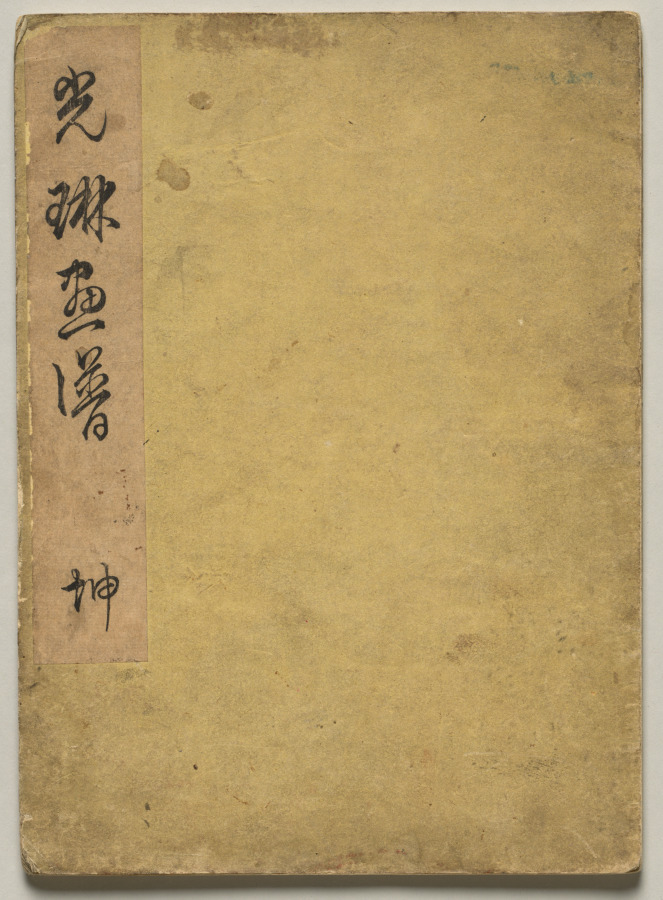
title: The Kōrin Picture Book (Volume 1)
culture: Japan, Edo period (1615–1868)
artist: Nakamura Hōchū (Japanese, d. 1819)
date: 1800s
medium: one of a set of two woodblock printed folding-books; ink and color on paper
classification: Bound Volume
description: Ogata Korin (1658-1716) was one of the most admired artists of Rimpa, or "decorative school painting." These books by the charming later-generation Rimpa artist Hochu record Korin's inventive designs.